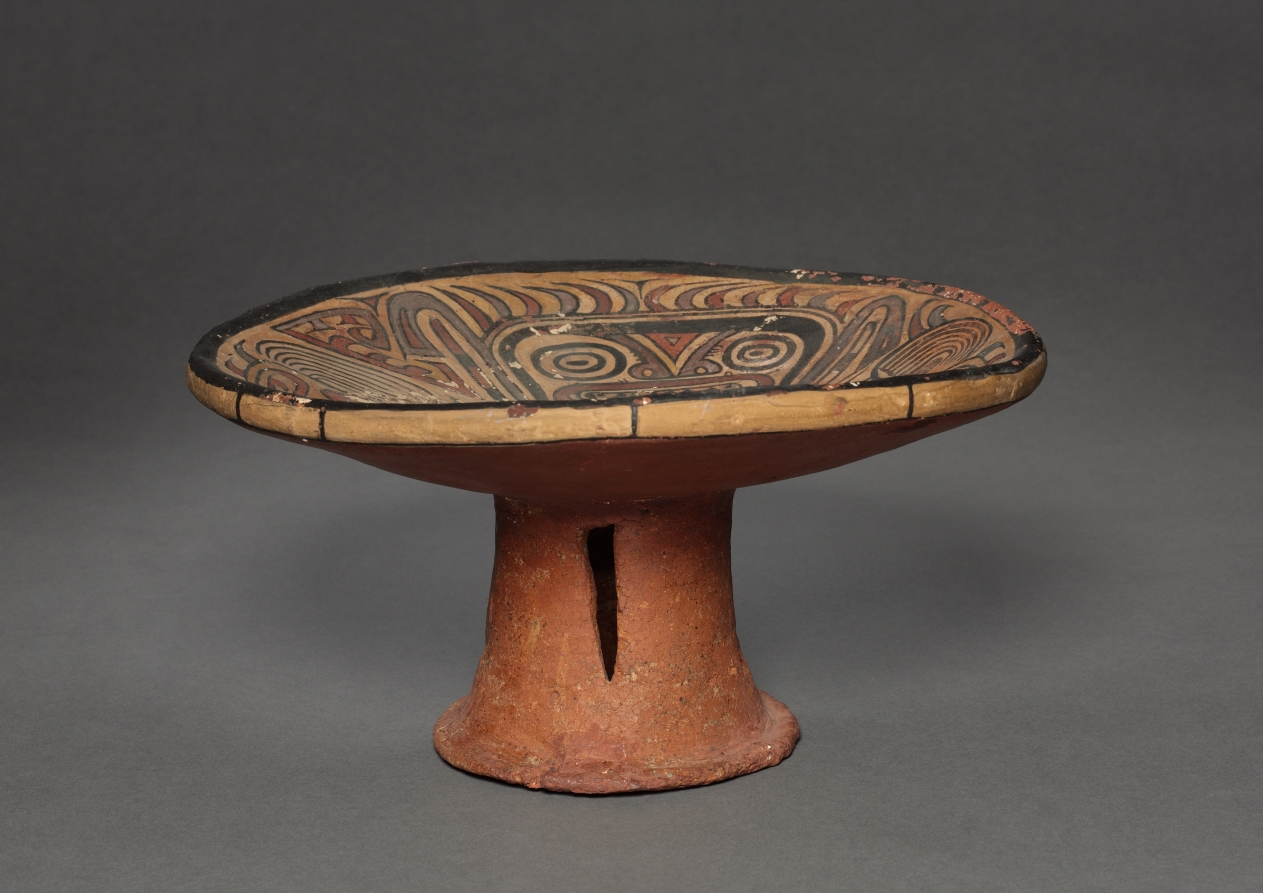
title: Pedestal Plate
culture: Panama, Coclé, 14th-15th century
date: 1300s-1400s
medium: earthenware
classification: Ceramic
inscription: Inscribed on base: "50-18-20/1 (?) 3 (?) 86"